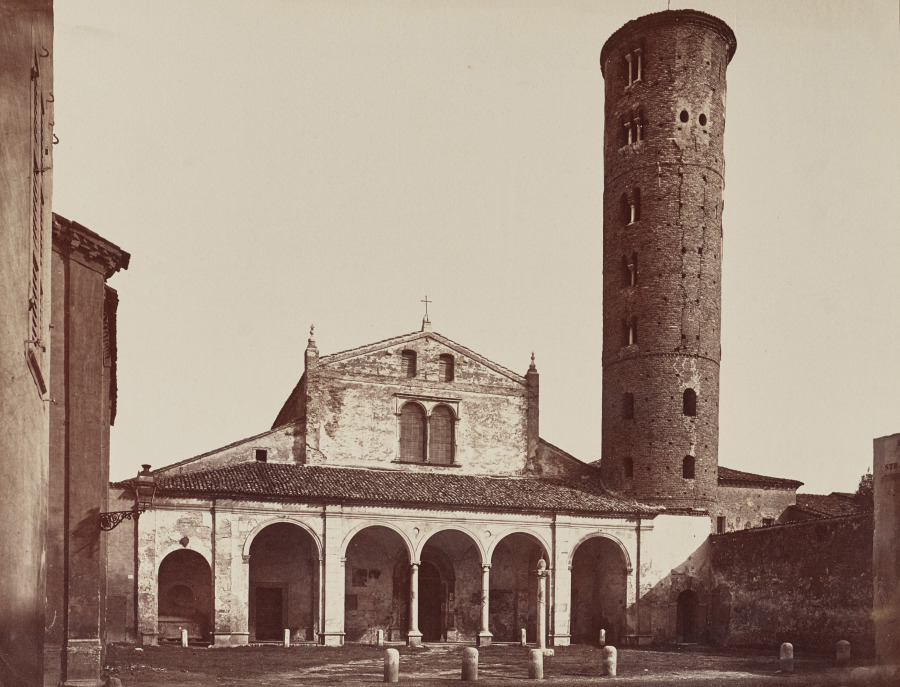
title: Church with Round Tower, Pompeii, Italy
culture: Italy, 19th century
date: c. 1860s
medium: albumen print from collodion negative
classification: Photograph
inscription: Written in pencil on verso: "PH/ 9054/ IT-272/ 1500"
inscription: Written in pencil on verso: "AD 137 / 353 (28)"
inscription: Stamped in black ink on verso:"I.C.(circled)"